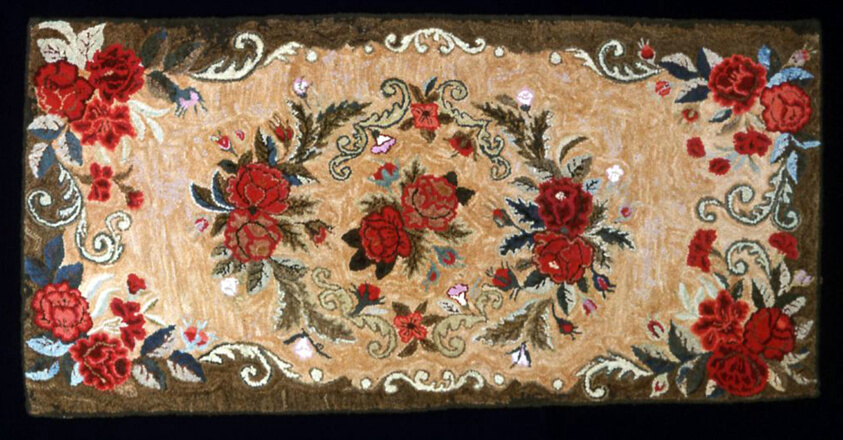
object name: Textile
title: Rug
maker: United States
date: 19th century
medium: Variety of fibers, plain weave with variety of fibers, yarns, felted, knitted, oblique interlaced and/or woven strips, forming "hooked" pile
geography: United States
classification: needlework - rug; textile; rug; weaving - carpet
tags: roses, botanical/floral, scrolls (motifs), foliage, wreaths, flowers